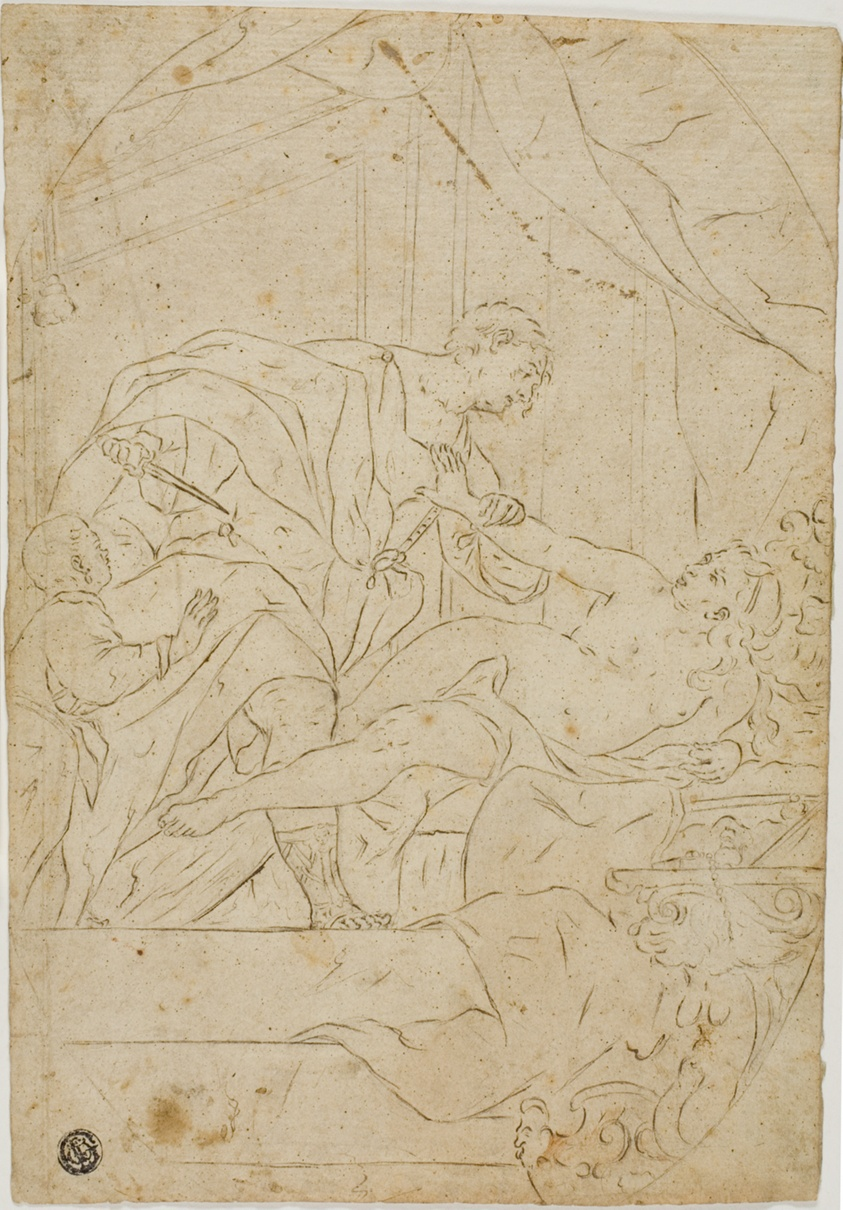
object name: Drawing and Watercolor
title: Rape of Lucretia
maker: After Giovan Gioseffo Dal Sole; Italian, 1654-1719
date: after 1700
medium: Pen and brown ink, over traces of black chalk, on tan laid paper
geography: Italy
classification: pen and ink drawings; drawings (visual works); prints and drawing